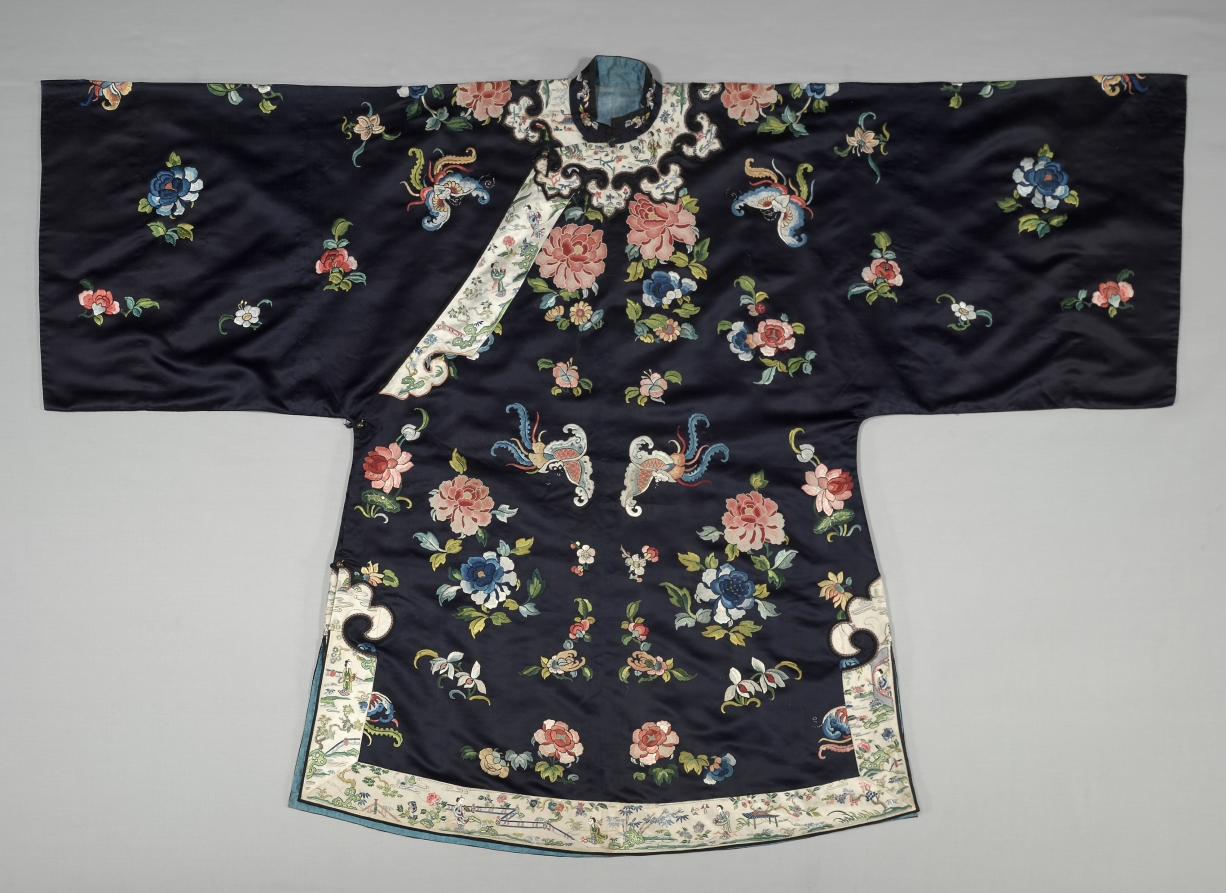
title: Han Woman's Jacket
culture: China, Qing dynasty (1644–1911)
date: late 1800s with additions from 1950s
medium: Silk, embroidery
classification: Garment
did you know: The sleeves could be turned back revealing a band embroidered with women in a landscape of flowers, trees, bridges, and pavilions.